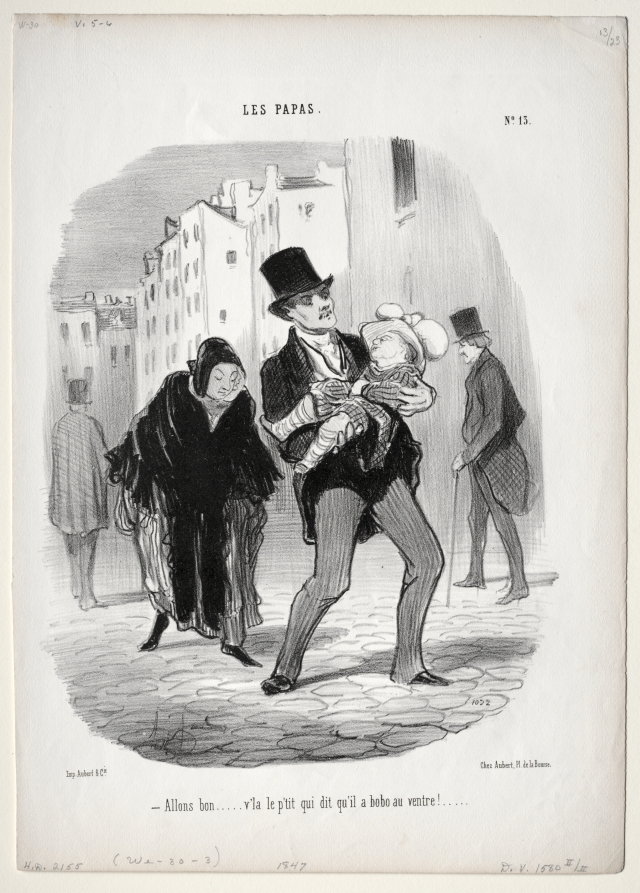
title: Come along, dear...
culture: France, 19th century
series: Fathers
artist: Honoré Daumier (French, 1808–1879)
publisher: Aubert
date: 1847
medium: lithograph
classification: Print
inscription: Above image, printed: LES PAPAS. / NO. 13 ; Below image, printed: -Allons bon. . . . . v'la le p'tit qui dit quil a bobo au ventre! . . . . .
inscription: Upper margin, in pencil: W+-30 V. 5-6 / 13/25 ; lower margin, printed: Imp. Aubert & Cie. / Chez Aubert, Pl. de la Bourse. ; lower margin in pencil: H.D. 2155 / (We-30-3) / 1847 / D. V. 1580 II/II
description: This print was published in Le Charivari (June 30, 1847) as plate 13 from the series Fathers.